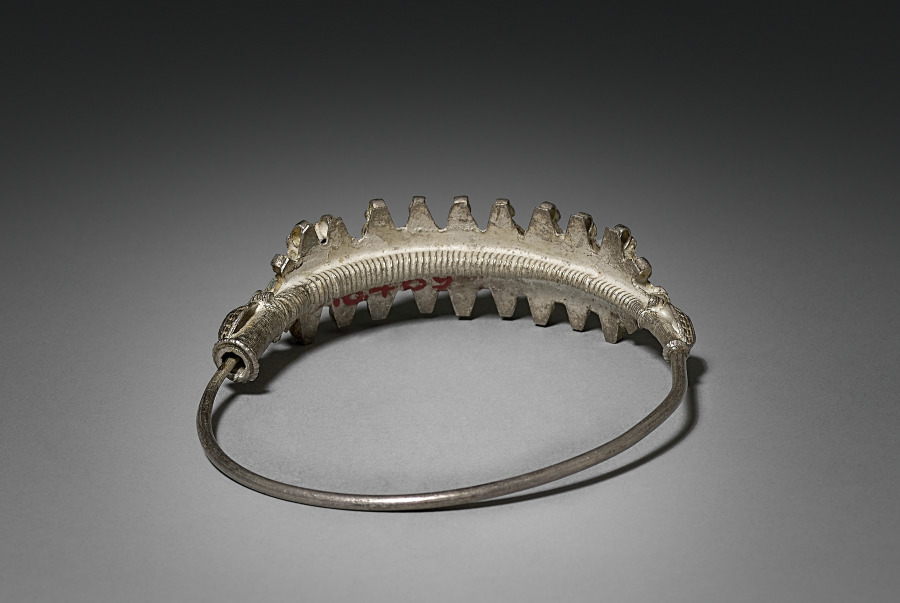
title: Nose Ring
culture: India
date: early 1900s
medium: silver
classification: Jewelry